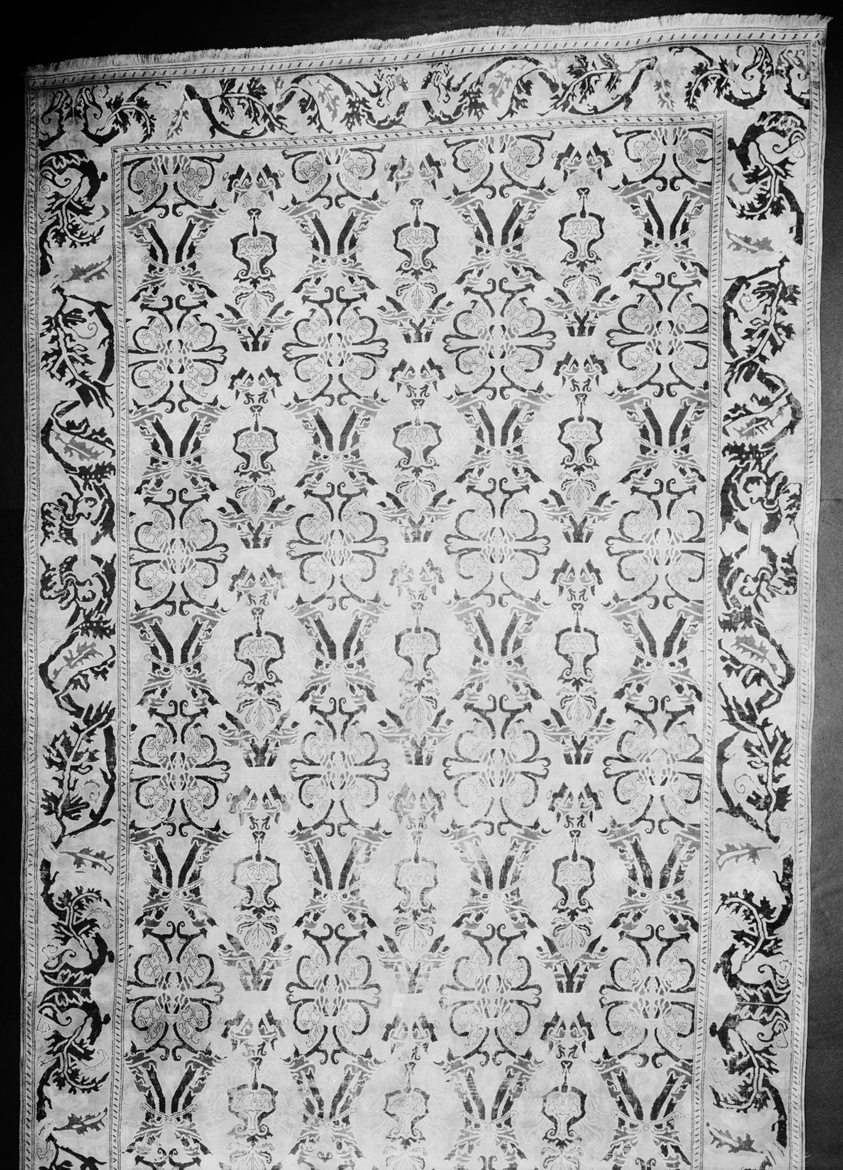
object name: Textile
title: Carpet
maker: Spain, Alcaraz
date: 1525/75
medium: Wool, plain weave with supplementary wrapping wefts forming cut pile through a technique known as "Spanish knots;" warp fringe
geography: Spain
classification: textile; weaving - carpet